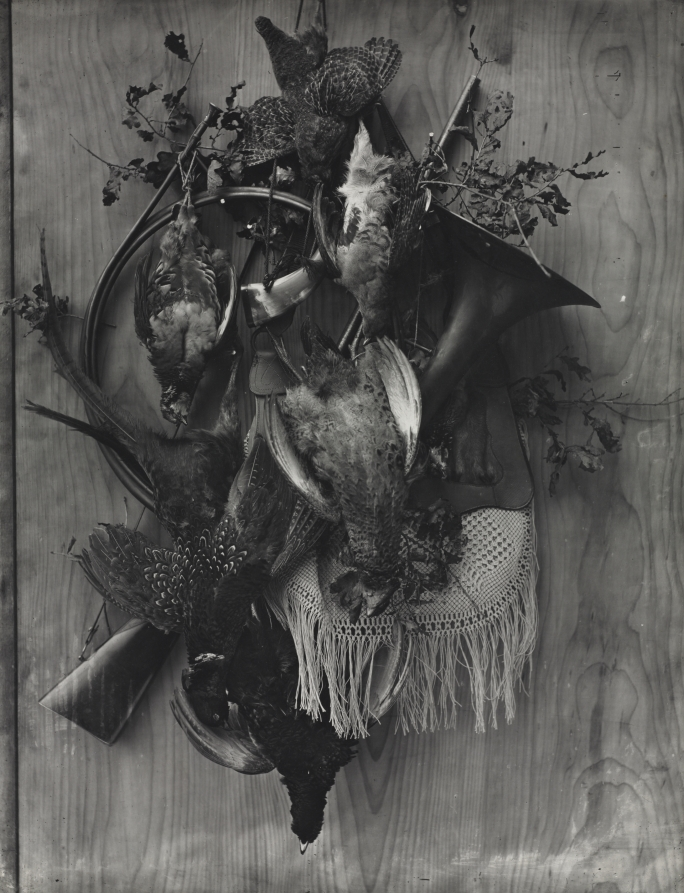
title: Trophy of the Hunt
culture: France, 19th century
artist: Adolphe Braun (French, 1812–1877)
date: c. 1867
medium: carbon print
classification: Photograph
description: Braun intended his extraordinarily large prints as affordable middle-class alternatives to the painted hunt scenes adorning the country houses of the European upper classes. Here he shows an array of game birds prized for their flavor and the hunting challenge they offer. The 19th-century versions, created by photographers and even some Impressionist painters, evoke a leisurely rural pastime that was becoming rare in an increasingly urban, industrialized France.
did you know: Adolphe Braun’s hunt still lifes continue a tradition popular in Northern European painting from the 17th century on.